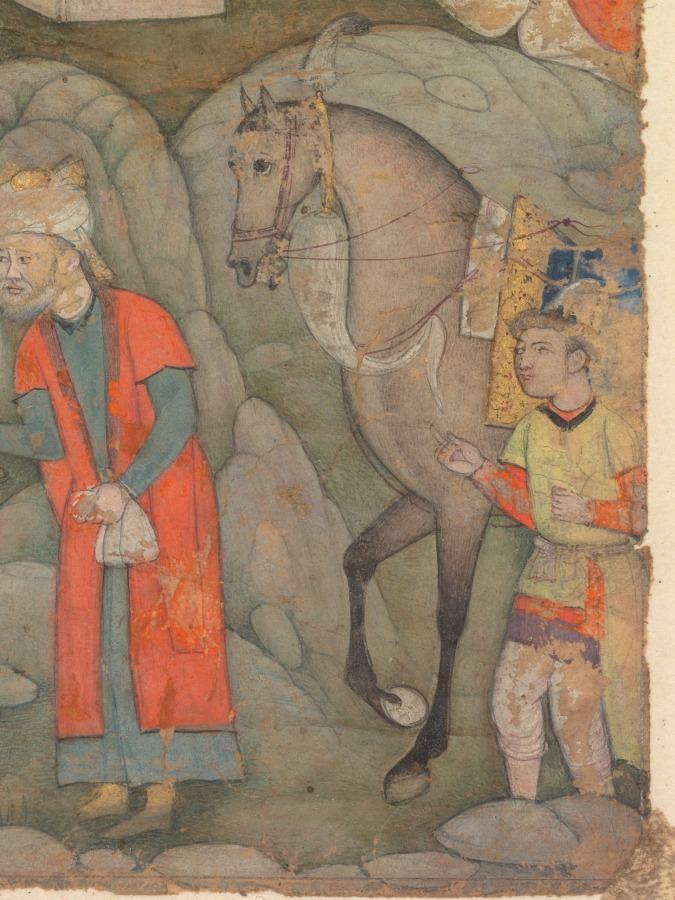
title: An Ambassador before Humayun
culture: Mughal India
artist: attributed to Miskin (Indian, active 1570s–c. 1604)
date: c. 1610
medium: Gum tempera and gold on paper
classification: Painting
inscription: Persian inscription at upper left probably added c. 1700s, in nasta‘liq script: the work of the master Miskin / Great King Hasan . . .]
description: Humayun, the second Mughal emperor of India, son of Babur and father of Akbar, is enthroned in an outdoor royal encampment. The scene recalls Humayun’s 15 years of exile between 1540 and 1555, many of which he spent traveling through Pakistan, Afghanistan, and Iran, after an Afghan rebel ousted him from India.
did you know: Humayun wore a special type of turban, his Taj-i Izzat (Crown of Power and Glory).